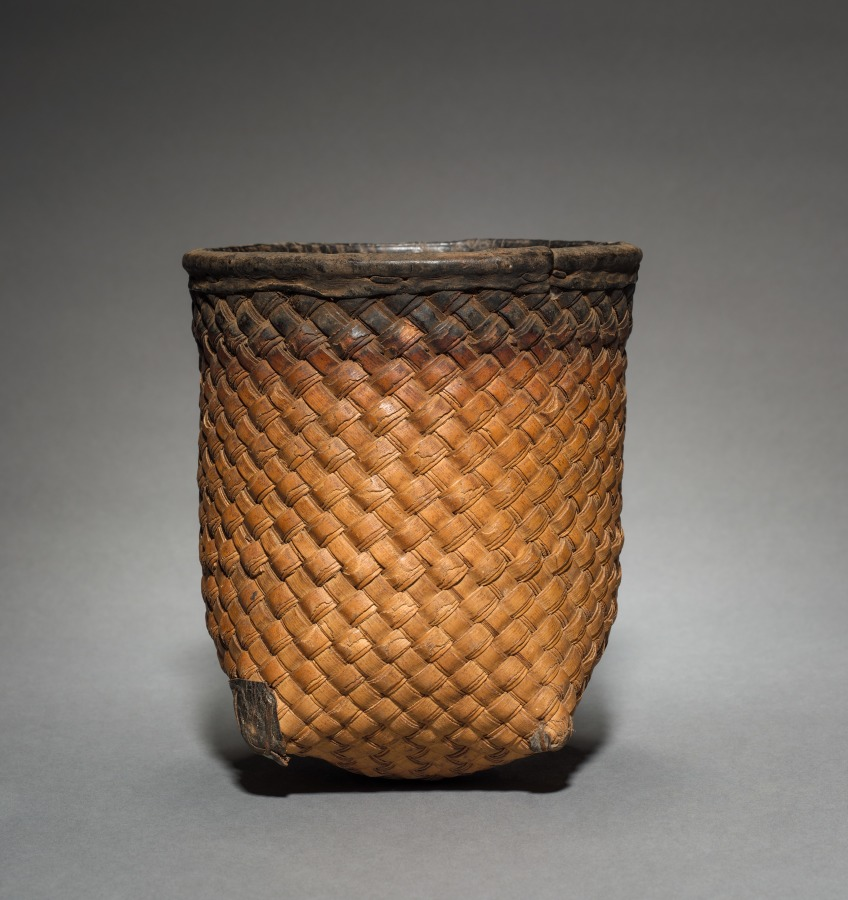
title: One of Ten Nesting Wedding Baskets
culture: Africa, Western Sudan, Burkina Faso, Lobi, 20th century (?)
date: c 1900s ?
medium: Plant fiber and leather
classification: Vessels